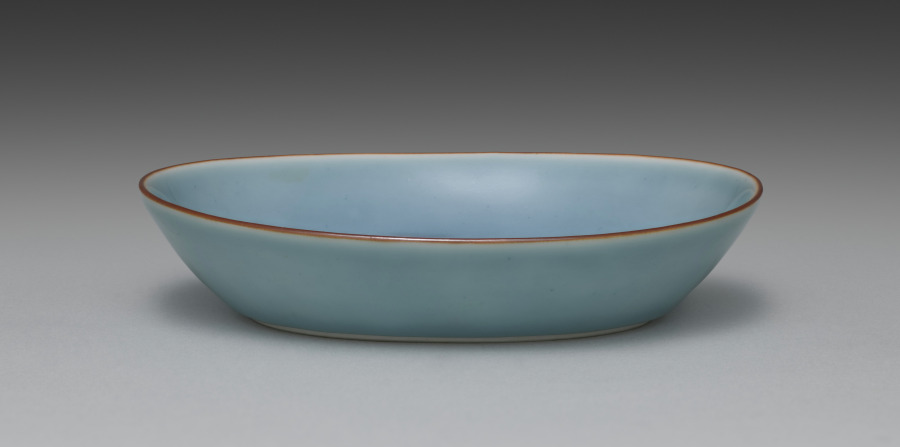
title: Dish from Dishes with Shells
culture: Japan, Taishō period (1912–26)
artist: Seifū Yohei IV (Japanese, 1872–1951)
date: 1914–46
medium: One from a set of five dishes; porcelain with blue glaze, iron oxide, and molded design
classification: Ceramic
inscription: 清風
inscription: 清風造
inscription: 清風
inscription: 成山清風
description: Yohei IV chose an aquatic theme for this set of five mukōzuke, side dishes. He added an iron oxide rim and used a concentrated blue glaze on both the interior and exterior. The glaze, named on the box lid, is his father’s “evening moon” (tsukiyoi) color. The conch in relief takes up the entire bottom of the dish. Up the sides are two snails on one end and on the other a scallop. This results in a boldly graphic, less realistic effect.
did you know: This set of dishes, mukōzuke, could be used for serving small side dishes at a tea gathering.